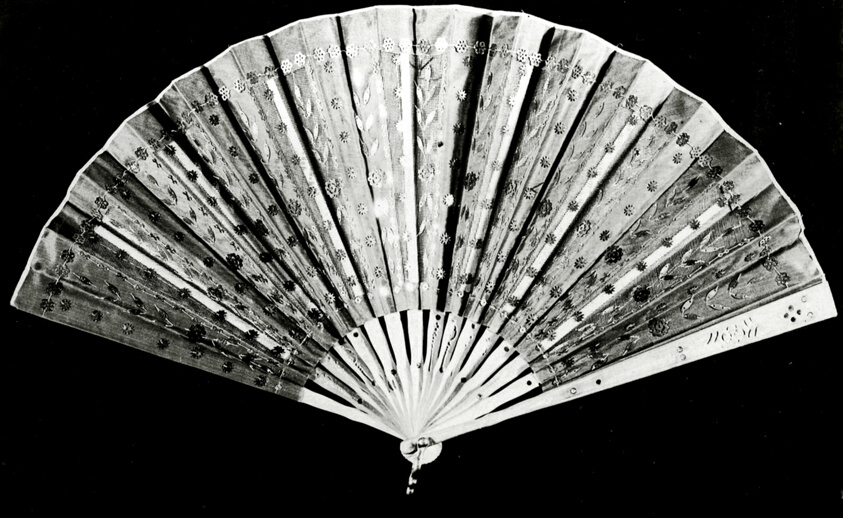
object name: Costume and Accessories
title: Fan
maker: France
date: 19th century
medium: Blue silk and gold net and gauze mount decorated with spangles; carved wood sticks with piqué; gilt rivet and loop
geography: France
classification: textile; fan - needlework; costume accessory - folding fan; costume accessory; costume